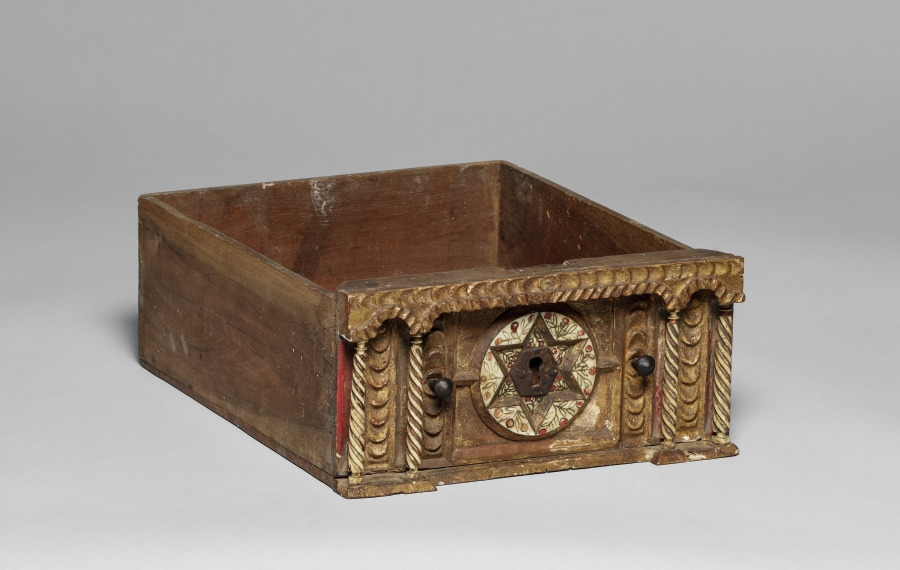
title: Chest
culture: Spain, Colonial, late 17th Century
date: late 1600s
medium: turned and joined wood, gilded and painted red with applied bone columns and bone inlays, wrought iron hardward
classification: Furniture and woodwork